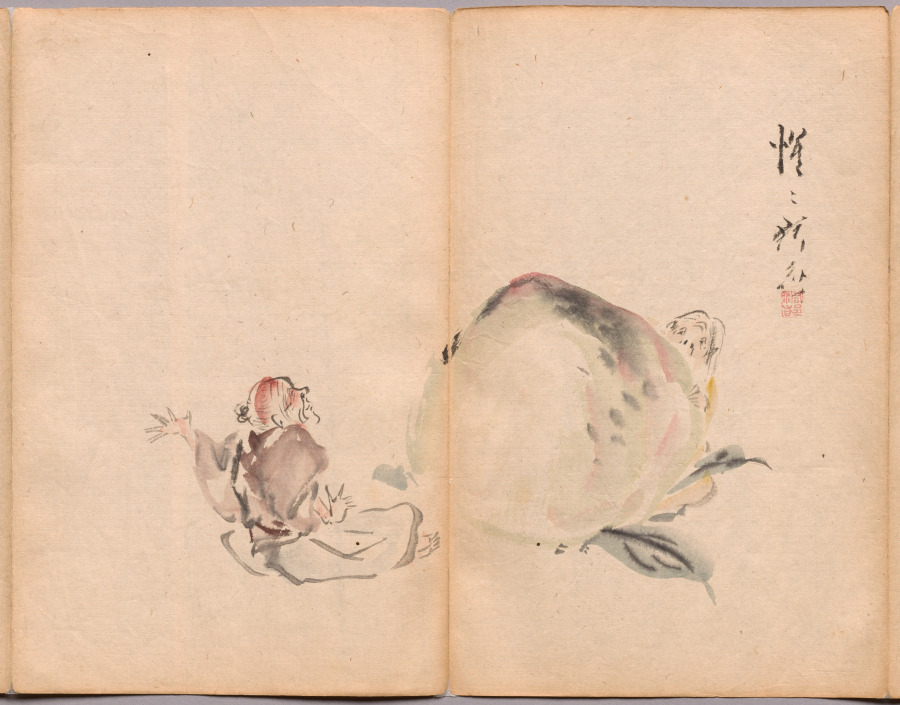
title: The Peach Boy from Sketch Album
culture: Japan, Edo period (1615–1868) to Meiji period (1868–1912)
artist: Kawanabe Kyōsai (Japanese, 1831–1889)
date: mid- late 1800s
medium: Accordion-style book of 26 double-leaves; ink and color on paper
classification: Bound Volume